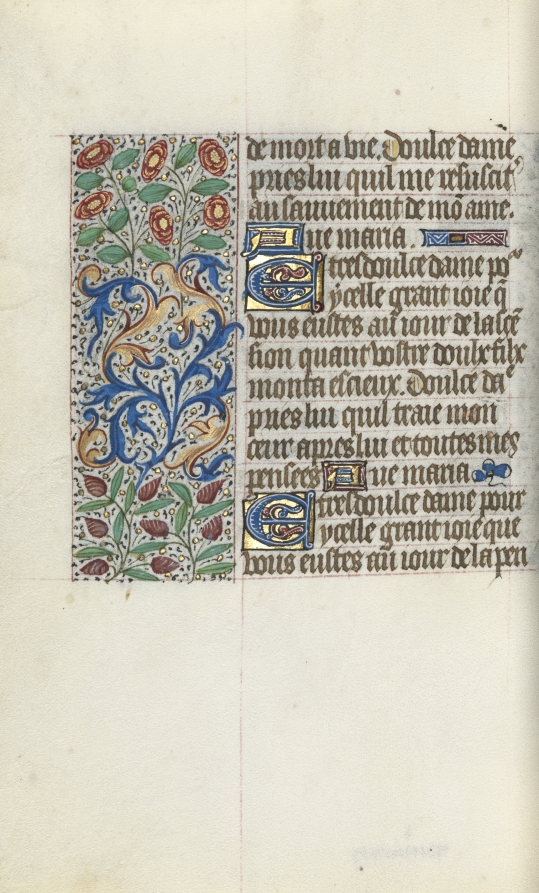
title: Book of Hours (Use of Rouen): fol. 150v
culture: France, Rouen, 15th century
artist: Master of the Geneva Latini (French, active Rouen, 1460–80)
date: c. 1470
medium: ink, tempera, and gold on vellum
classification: Bound Volume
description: In the late 1400s and early 1500s Rouen was an established and important center of book production. The city’s cathedral had a wealthy chapter that spent large sums of money to commission books and to maintain its extensive library. The stationers and booksellers would have likely been concentrated in or near the cathedral precinct. This artist, named after a manuscript now in Geneva, was Rouen’s principal illuminator during the second half of the 1400s.